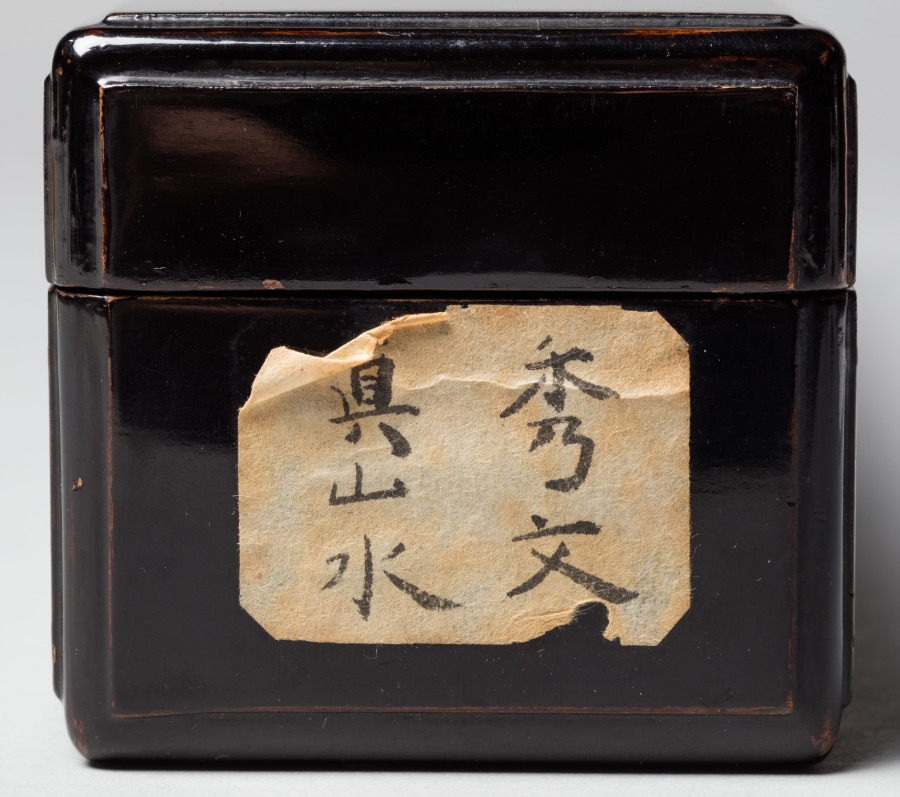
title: Landscape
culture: Japan, Muromachi period (1392–1573)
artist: Judō (Japanese, active 16th century)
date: 1500s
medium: hanging scroll, ink and light color on paper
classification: Painting